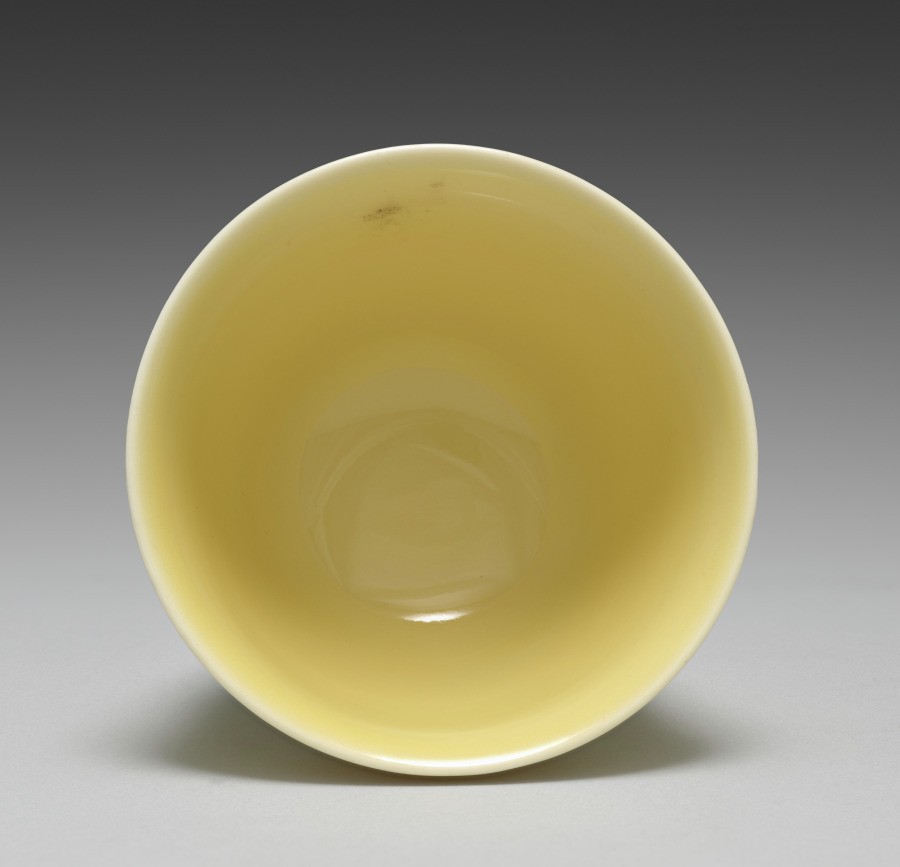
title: Cup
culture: Japan, Taishō period (1912–26) or Shōwa period (1926–89)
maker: Seifū Yohei IV (Japanese, 1872–1951)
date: 1914–46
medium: porcelain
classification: Ceramic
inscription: 清風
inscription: 清風造 【印】成山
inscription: 清風盧人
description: Like his father, Yohei IV also produced works with red or yellow monochrome glazes. His yellow-glazed works include this set of five drinking cups, a pair of sake pourers CMA 2022.216, and a sweets bowl molded into the shape of a chrysanthemum CMA 2022.218.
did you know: Seifū Yohei IV learned the ceramics industry from his father and painting from Tanomura Shosai.